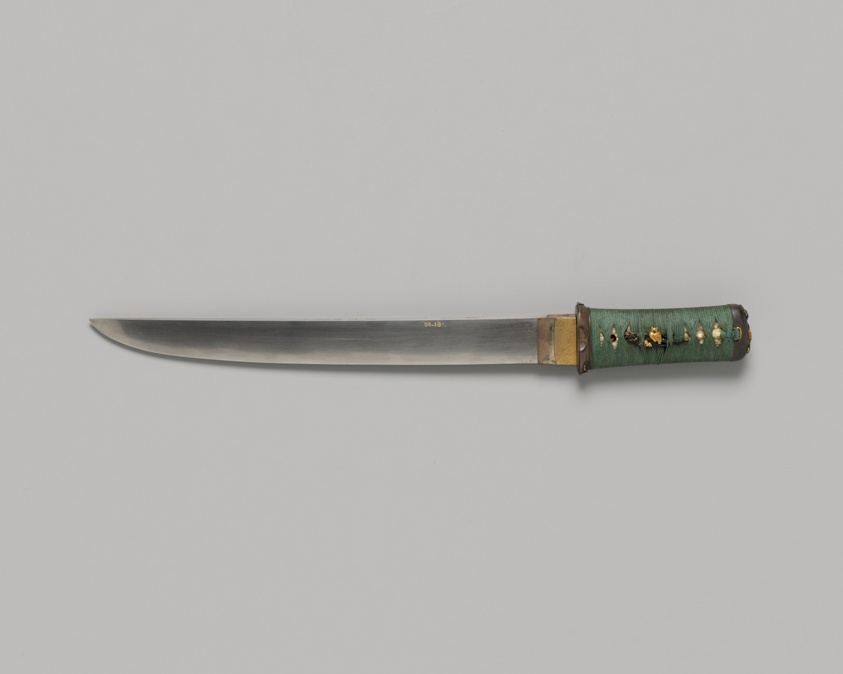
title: Dagger (Tanto)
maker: Fujiwara Teruhiro ((Japanese, 17th century))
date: 17th century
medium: Steel, wood, lacquer, ray skin (karagi), gold, and copper-gold alloy (shakudo)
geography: Japan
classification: metal; weapon; asian art